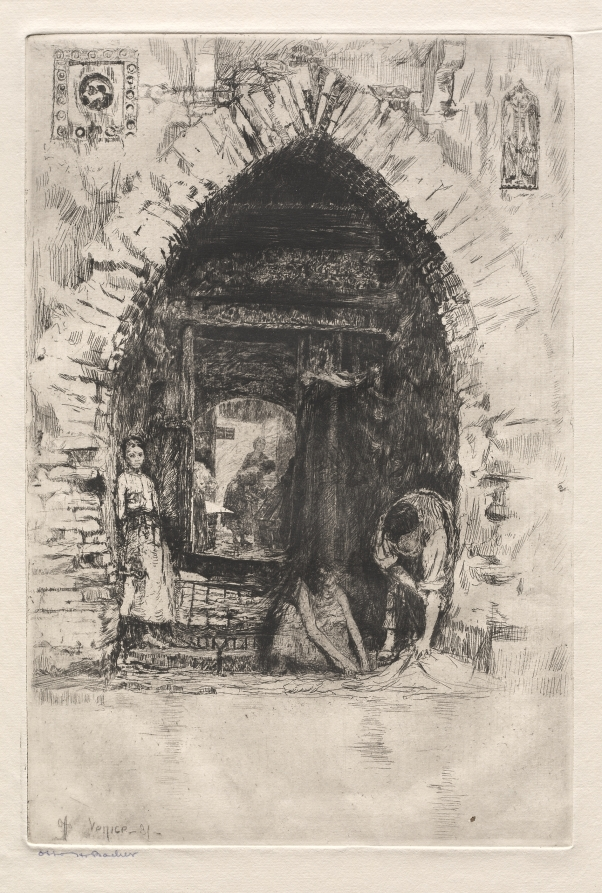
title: Etchings of Venice: Laundry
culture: America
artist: Otto H. Bacher (American, 1856–1909)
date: 1881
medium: etching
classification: Print